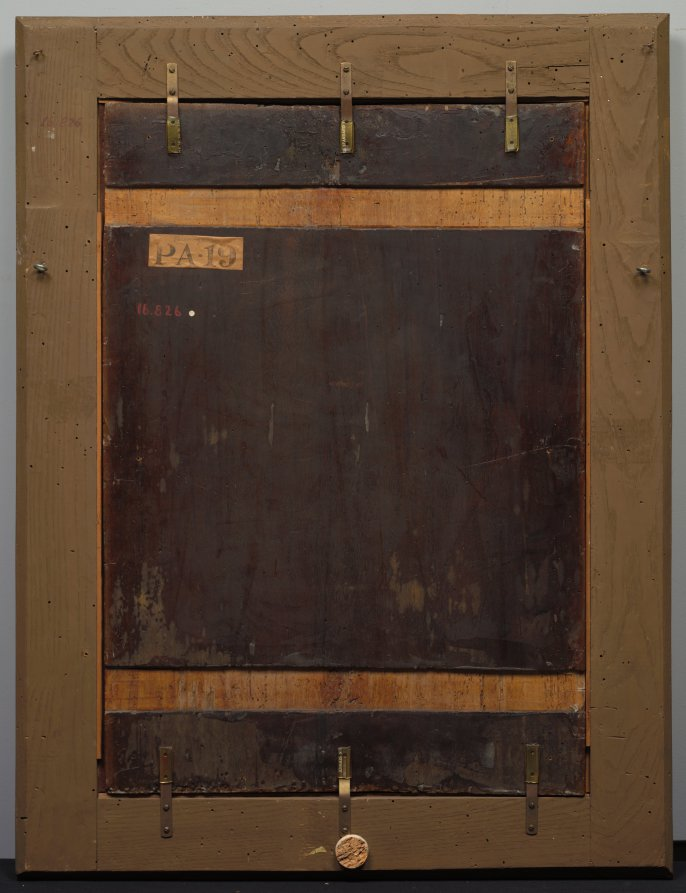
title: Virgin and Child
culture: Italy, 15th century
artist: follower of Lorenzo di Credi (Italian, 1459–1537)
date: 1400s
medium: oil on wood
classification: Painting